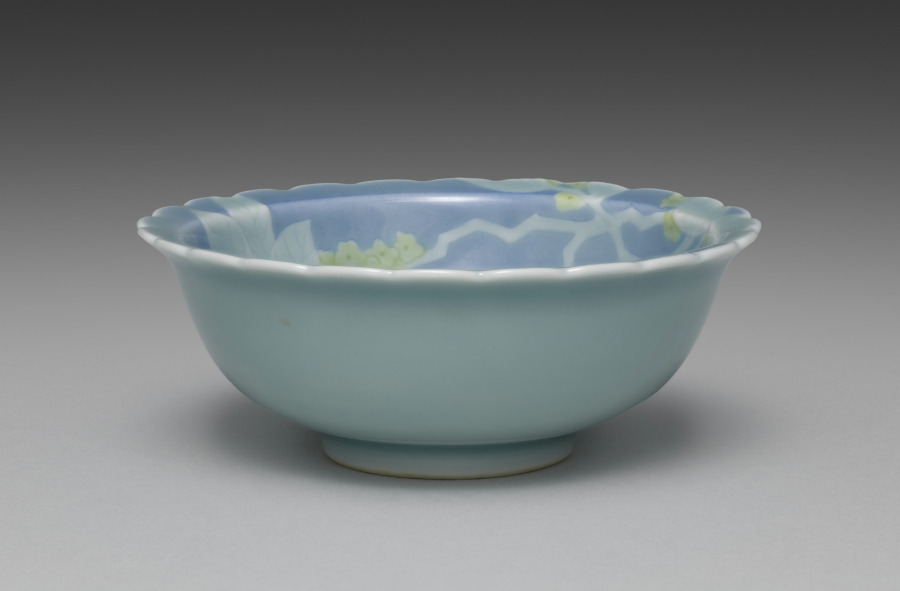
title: Dish from Dishes with Flowers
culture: Japan, Taishō period (1912–26) or Shōwa period (1926–89)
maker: Seifū Yohei IV (Japanese, 1872–1951)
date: 1914–46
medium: One from a set of five dishes; porcelain with underglaze yellow and blue glaze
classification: Ceramic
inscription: 清風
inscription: 清風造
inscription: 成山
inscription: 清風盧人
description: One can imagine a cool summer breeze when looking at this set of dishes, each shaped with a crenulated mouth and glazed with blue. Around the rim and into the basin, the bowls have low-relief designs of flowers with underglaze yellow petals; their leaves and stems show white through the glaze. On each dish, the design continues over the rim onto one side.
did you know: Seifū Yohei IV’s dishes with flowers feature underglaze yellow.